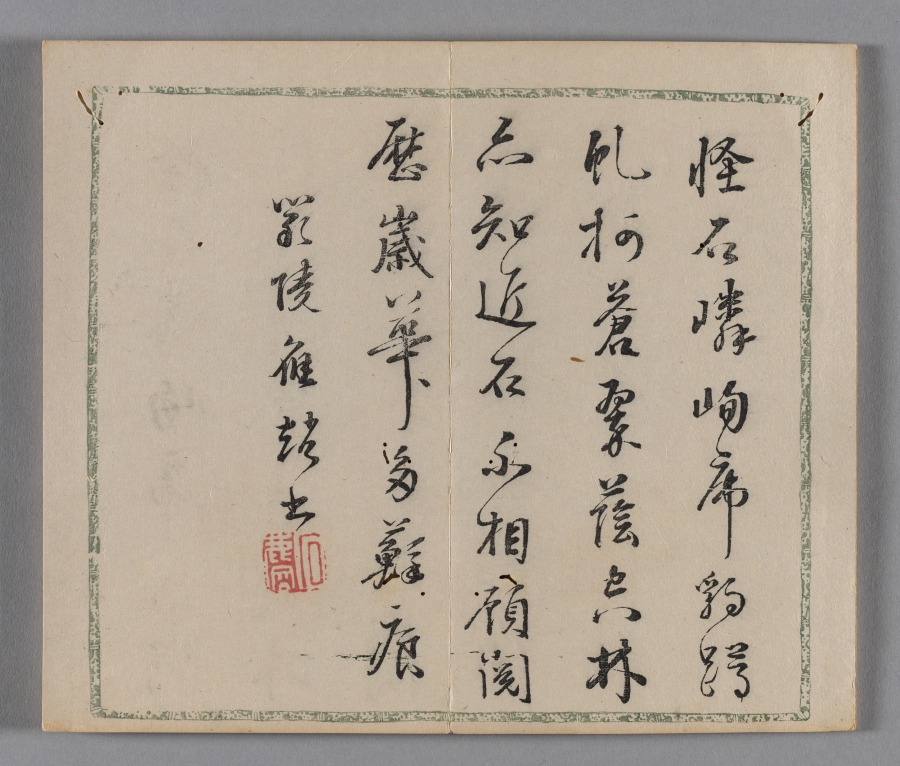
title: Ten Bamboo Studio Painting and Calligraphy Handbook (Shizhuzhai shuhua pu): Round Fans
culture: China, Qing dynasty (1644-1911)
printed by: Hu Zhengyan (Chinese, c. 1584–1674)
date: 1633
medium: Woodblock-printed book; ink and colors on paper; first edition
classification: Print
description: Color printing reached a level of perfection in the early 1600s, as seen in this Ten Bamboo Studio Collection of Calligraphy and Painting and the Mustard Seed Garden Manual of Painting (printed 1679 and 1701). The painterly quality, precision in registering (aligning) the woodblocks, and harmonious colors made them the most successful color print editions in Chinese history. Both editions were printed and compiled in Nanjing, spread nationwide, and had a great impact on the arts in Japan and Korea.